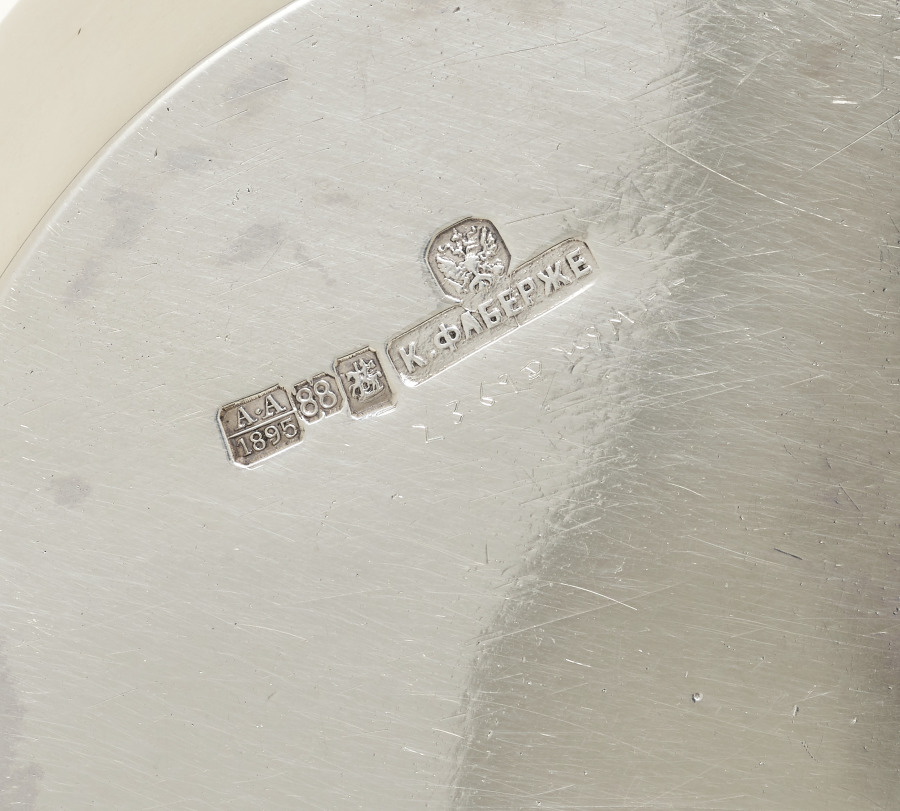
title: Bowl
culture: Russia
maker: House of Fabergé (Russian, 1842–1918)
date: 1895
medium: silver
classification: Silver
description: While Fabergé mainly produced objects with historicist ornamentation drawing upon earlier periods, the firm was also attentive to the latest fashions in the European decorative arts. This silver bowl is executed in the Art Nouveau style popular at the time. Its indented body and the asymmetrical handle convey a sense of liquid movement, accentuated by the undulating reflections on the silver surface.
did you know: The size suggests that it was used either for sweets or simply displayed for its aesthetic value.